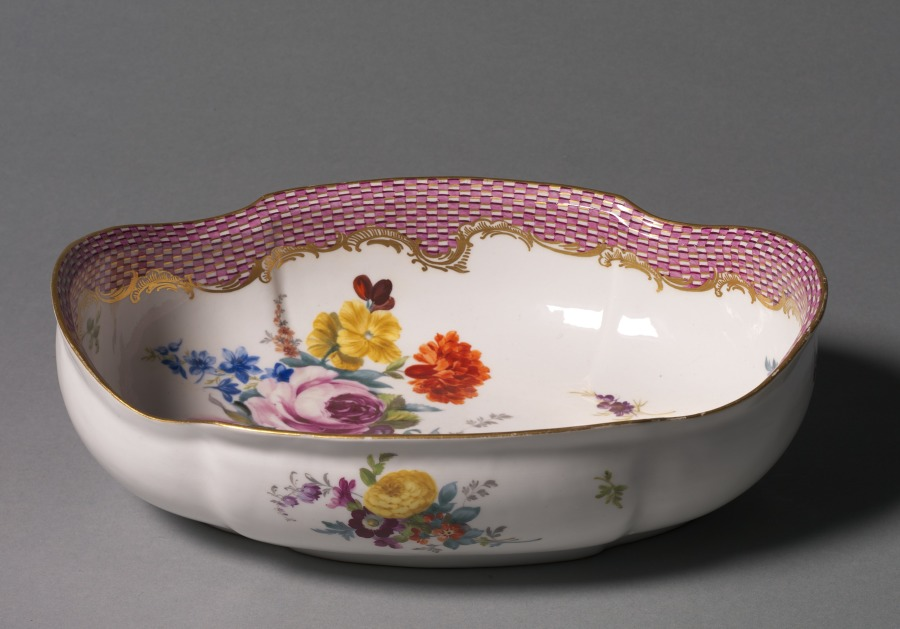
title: Basin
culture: Germany, Meissen, 18th century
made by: Meissen Porcelain Factory (German, est. c. 1710)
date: c. 1765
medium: porcelain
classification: Ceramic